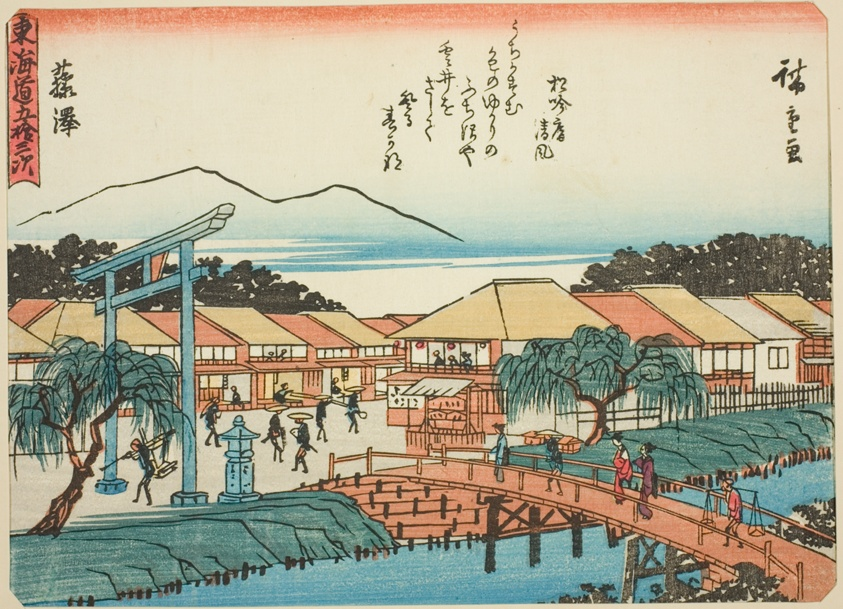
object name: Print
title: Fujisawa, from the series "Fifty-three Stations of the Tokaido (Tokaido gojusan tsugi)," also known as the Tokaido with Poem (Kyoka iri Tokaido)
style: Japanese (culture or style)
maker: Utagawa Hiroshige 歌川 広重; Japanese, 1797-1858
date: c. 1837/42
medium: Color woodblock print; chuban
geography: Japan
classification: woodblock print; print; asian art